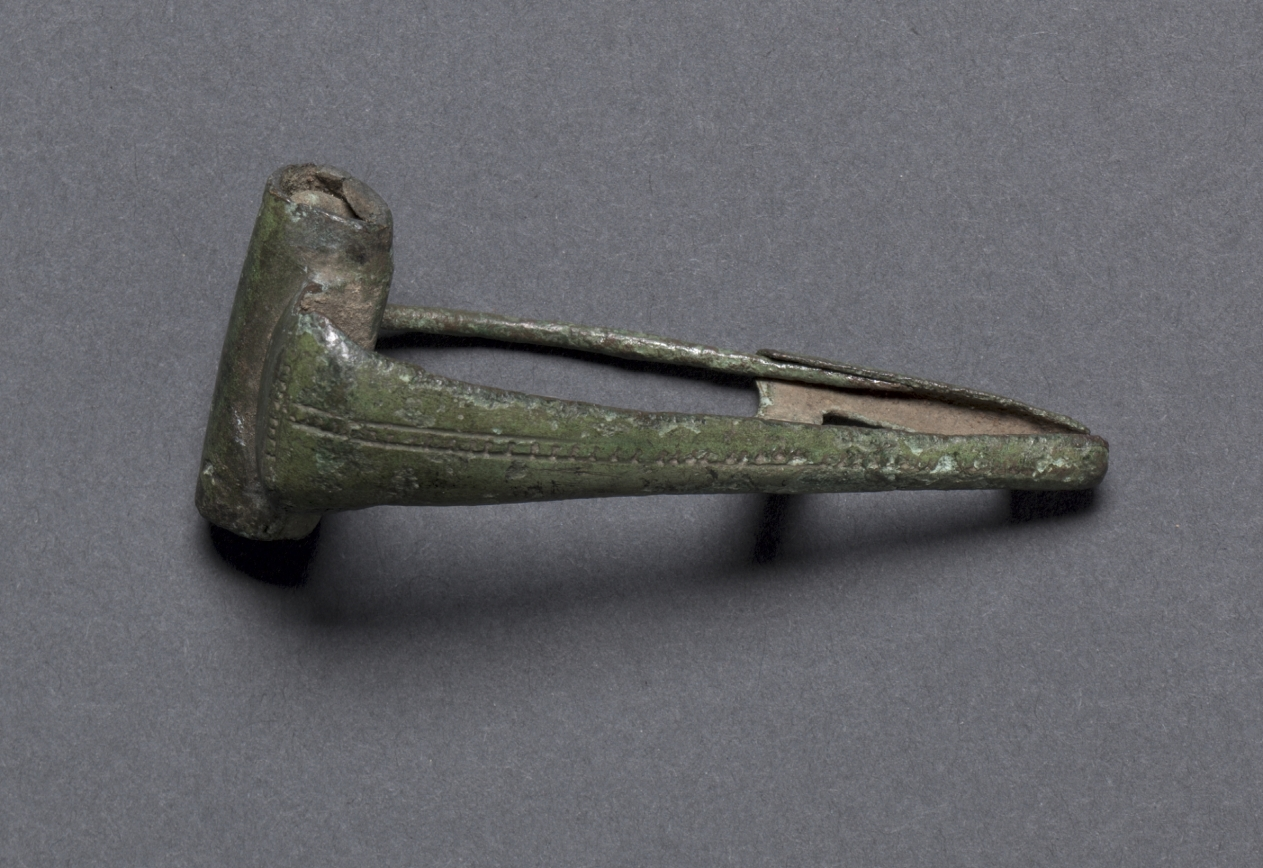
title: Bow-Shaped Fibula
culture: Classical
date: 450–1 BCE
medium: bronze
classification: Jewelry